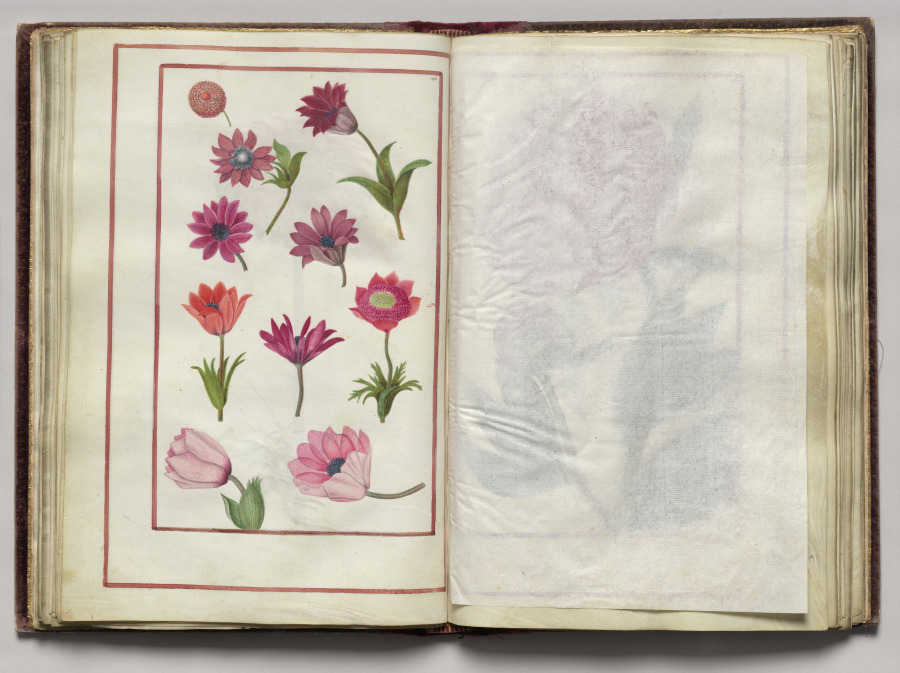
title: Florilegium (A Book of Flower Studies)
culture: France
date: 1608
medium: bound manuscript of 48 leaves, 77 drawings; watercolor, ink, silver, and gold over occasional traces of pencil, on vellum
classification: Bound Volume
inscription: Dated: Poitiers 1608 (on frontispiece) Signed: On frontispiece in black ink, lower right: Van Kuyk Notation on drawing: Frontispiece: in pencil, lower margin: * élève de Van Kessel, peintre flammand (* in pencil also appears in front of Van Kuyk's name).